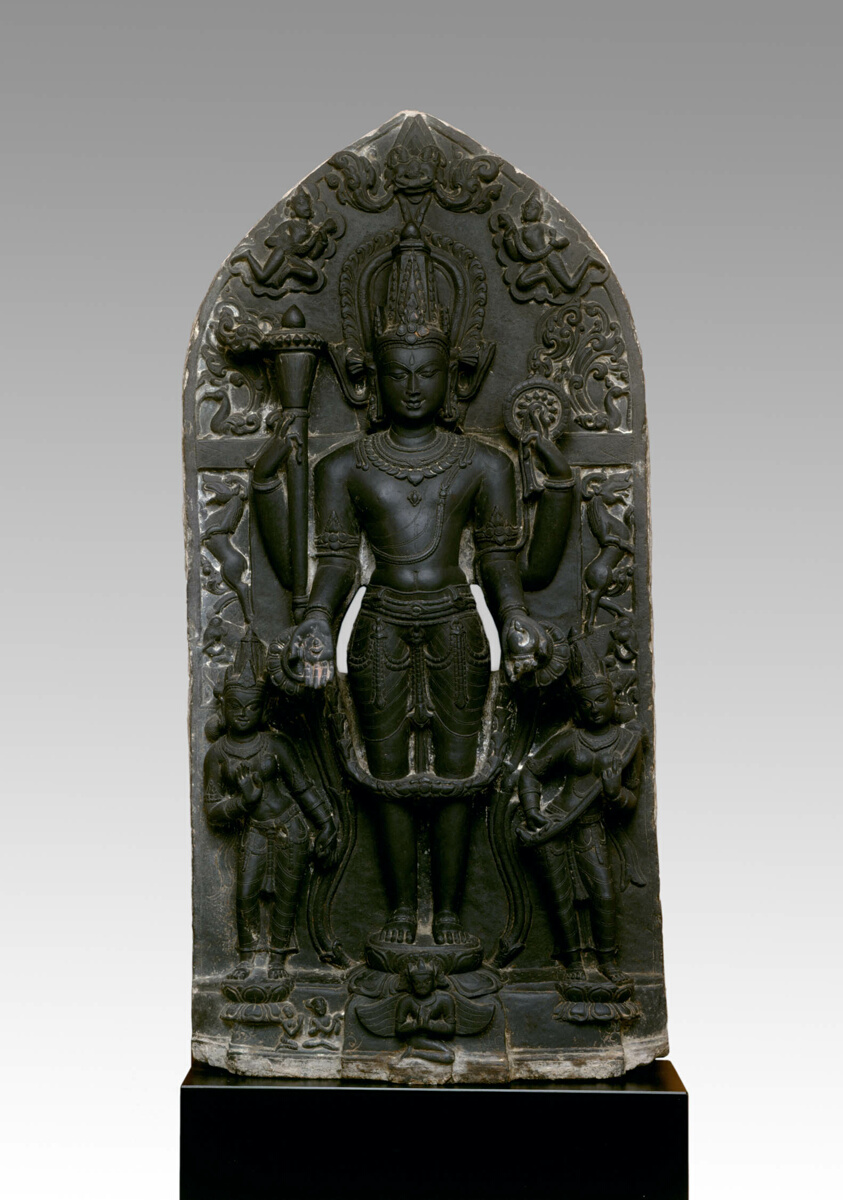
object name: Sculpture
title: Vishnu Trivikrama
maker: Bangladesh or India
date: Pala period, 11th century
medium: Black basalt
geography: Bangladesh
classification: stone; sculpture; asian art